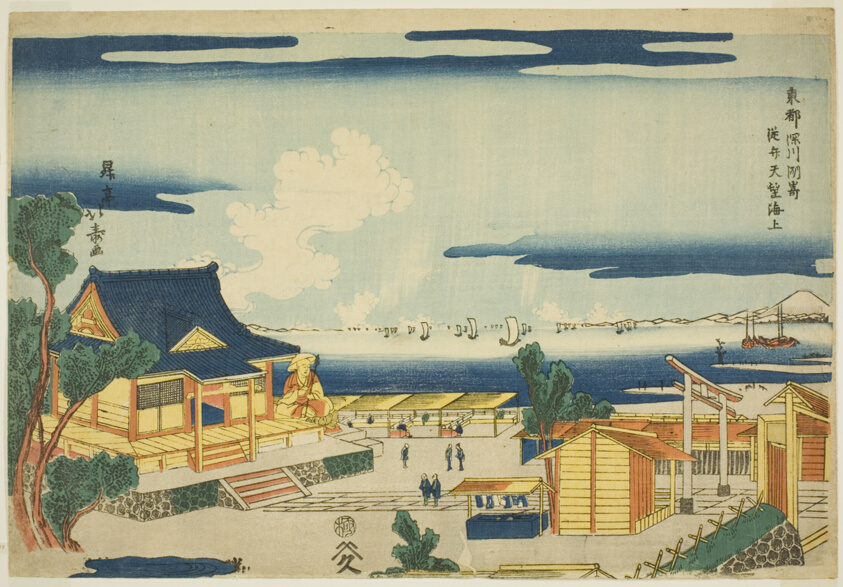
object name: Print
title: Looking out to Sea from the Benten Shrine at Susaki in Fukagawa (Fukagawa Susaki Benten yori kaijo o nozomu), from the series "Eastern Capital (Toto)"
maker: Shotei Hokuju (Japanese, active c. 1789-1818)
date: c. 1789/1818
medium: Color woodblock print; oban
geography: Japan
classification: woodblock print; print; asian art